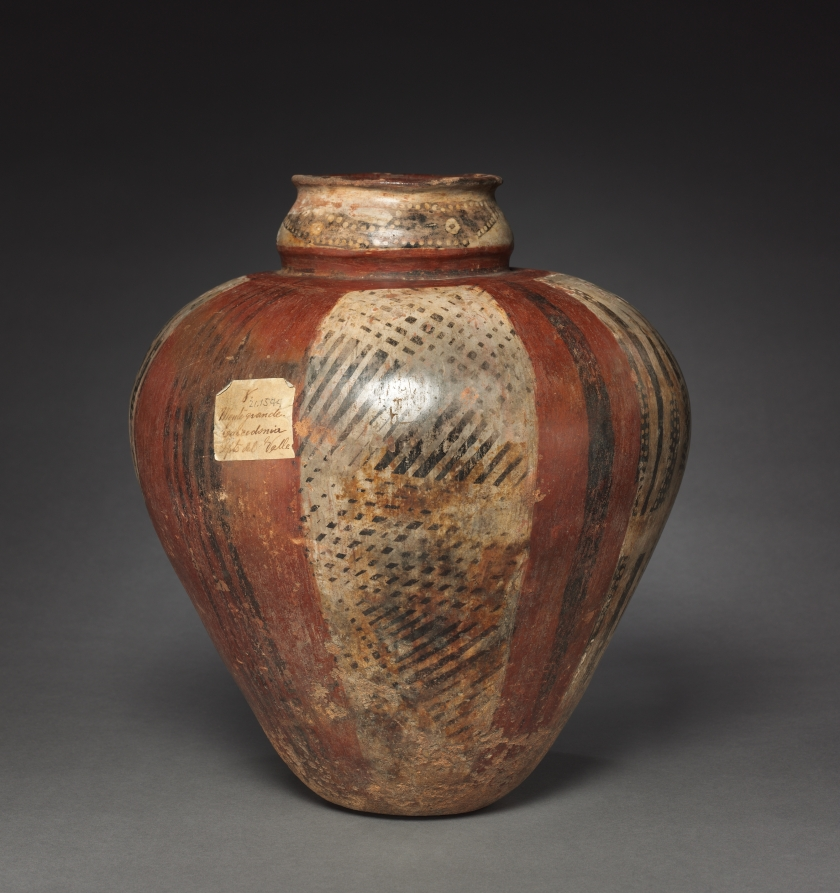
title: Jar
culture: Colombia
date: before 1550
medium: pottery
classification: Ceramic